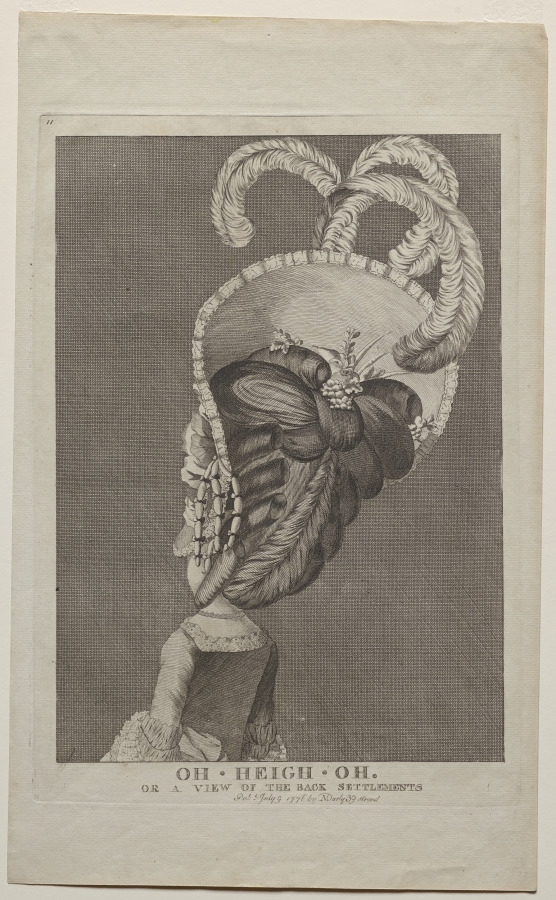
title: Oh Heigh Oh or A View of the Back Settlements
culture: England, 18th century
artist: Matthew Darly (British, active 1741–1780)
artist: and/or Mary Darly (British, active 1756–1777)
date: 1776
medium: engraving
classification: Print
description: Satirical prints were very popular in 18th-century England. In 1776 the region that is now Ohio was part of New France. Unlike the thirteen colonies on the eastern seaboard, New France was never effectively colonized and the population remained small. Since the main interest of the French was commercial exploitation (the basis of the economy was the fur trade), communities remained only frontier outposts.